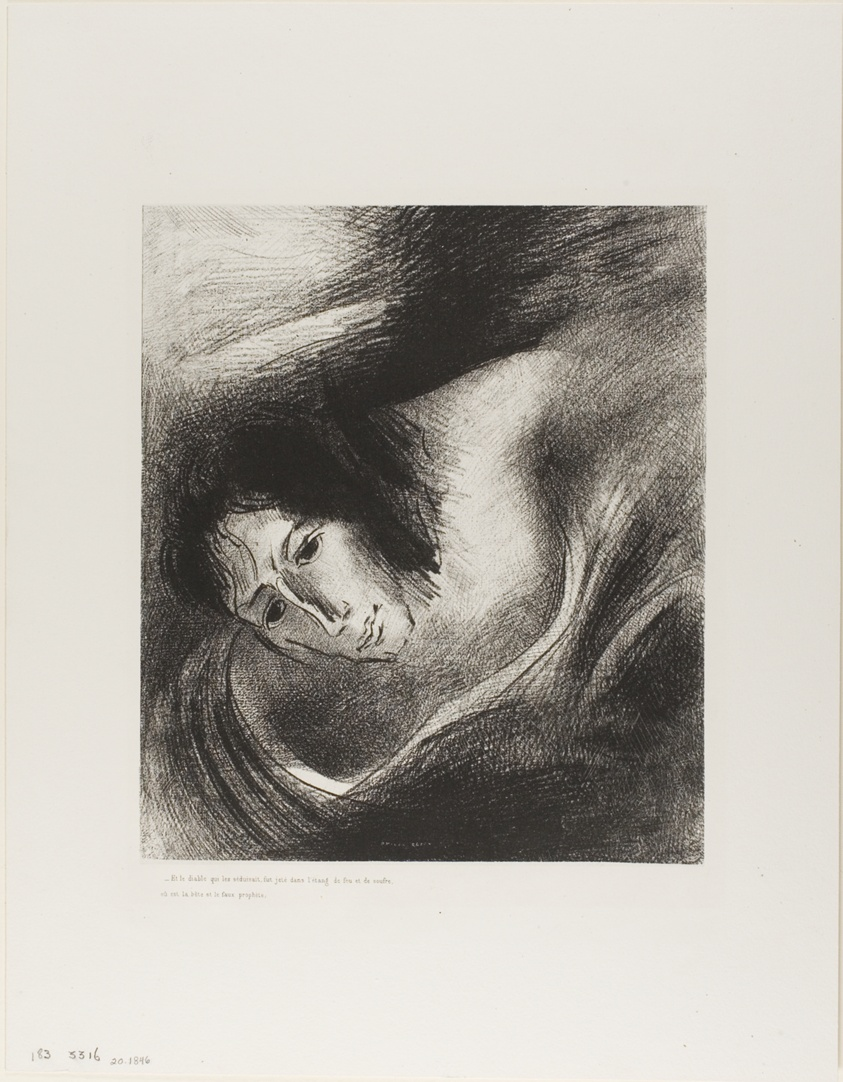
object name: Print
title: And the Devil that had Deceived them was Cast into the Lake of Fire and Brimstone, Where the Beast and the False Prophet Are, plate 10 of 12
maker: Odilon Redon (French, 1840-1916)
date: 1899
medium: Lithograph in black on ivory China paper laid down on ivory wove paper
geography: France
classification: lithograph; print; prints and drawing; paper